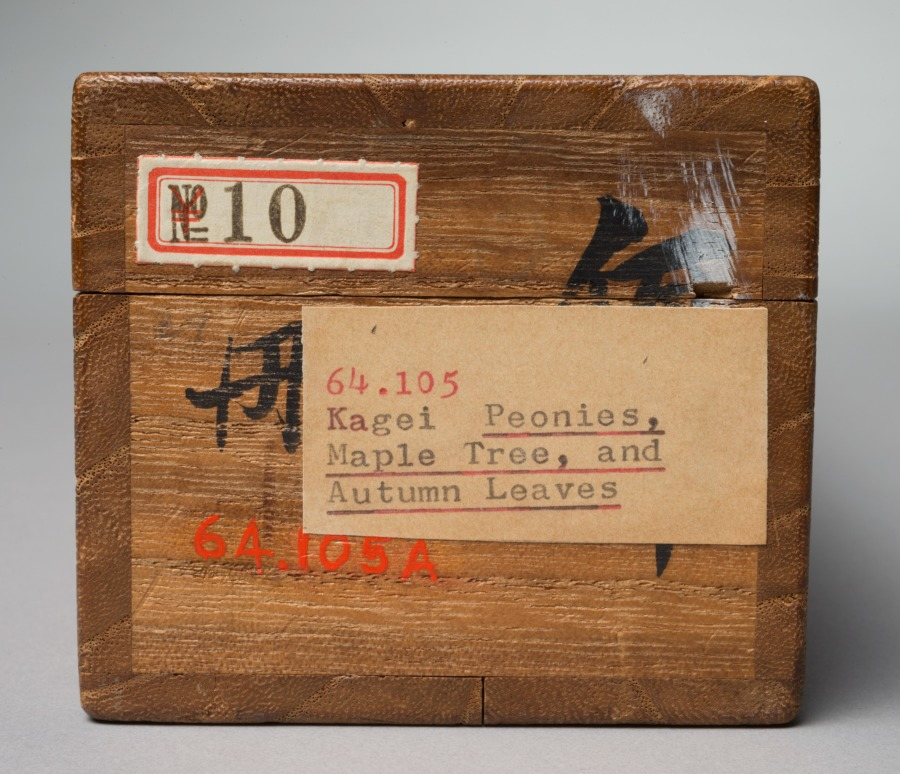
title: Peonies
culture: Japan, Edo period (1615–1868)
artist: Tatebayashi Kagei (Japanese, active mid-1700s)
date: mid 1700s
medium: hanging scroll; ink and color on paper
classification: Painting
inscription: lower right, Kagei's signature in black, a round red seal and a small square one.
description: A proliferation of white tree peonies dominates this composition. Behind them are tall, feathery-topped susuki grasses and leafy deciduous trees. Tatebayashi Kagei restricted his palette to ink with red and white color, along with sparing use of green in the peony leaves and the blades of grass. He made generous use of the “dripping-in” (tarashikomi) technique, layering pooled ink and color, in the peony leaves. The areas left in reserve create the impression of insect-eaten or late season foliage.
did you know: In 1738, Kagei received a copy made by Ogata Kōrin of a fan painting by Tawaraya Sōtatsu from Kōrin's brother Ogata Kenzan, so some think he trained with Kenzan in Edo (present-day Tokyo).